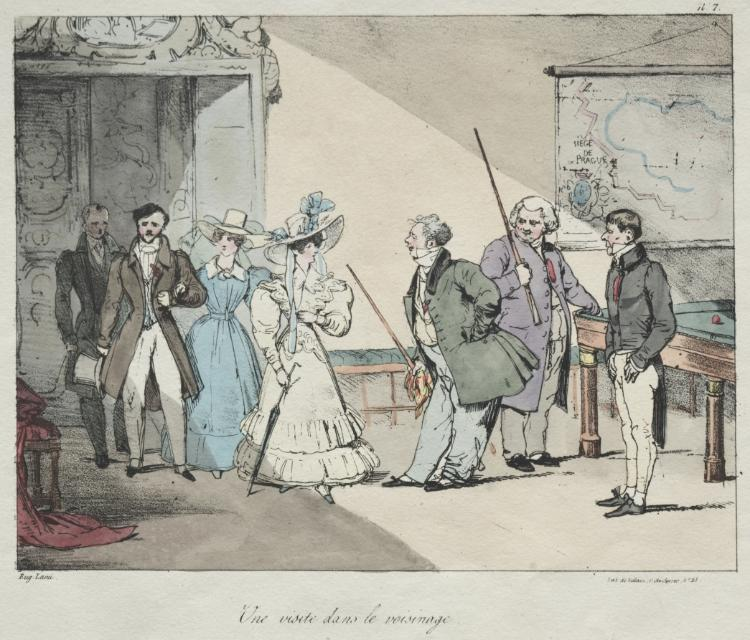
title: Life of the Chateau: A Visit in the Neighborhood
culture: France, 19th century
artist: Eugène Louis Lami (French, 1800–1890)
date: 1828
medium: lithograph, hand colored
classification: Print